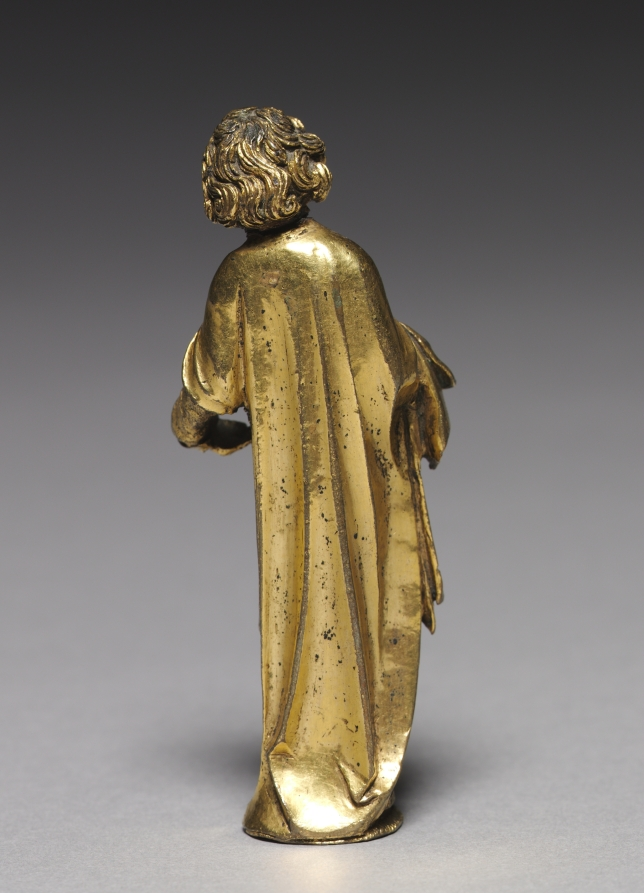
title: Mourning Saint John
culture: Germany, Franconia, late 15th century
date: late 1400s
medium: gilt bronze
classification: Sculpture